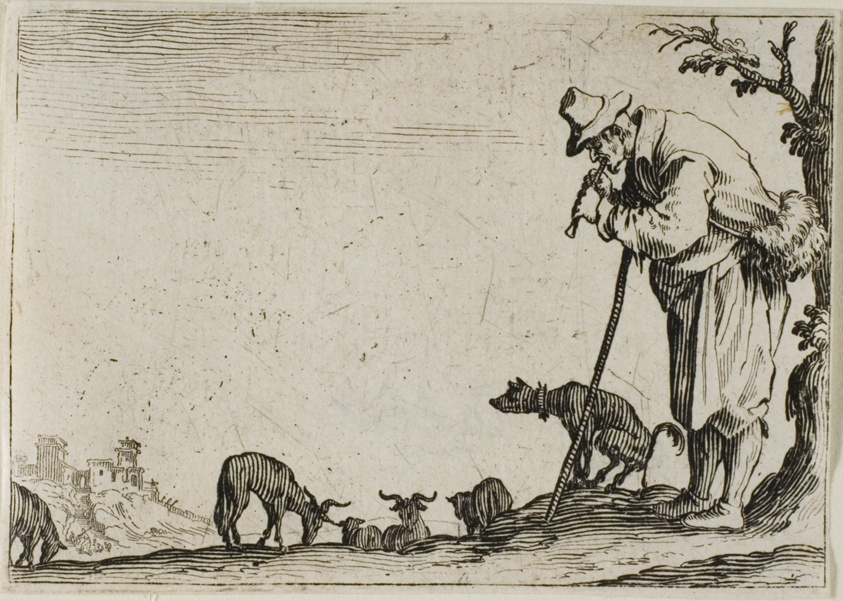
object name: Print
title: The Shepherd Playing a Flute, from The Caprices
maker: Jacques Callot (French, 1592-1635)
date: c. 1622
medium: Etching in black on ivory laid paper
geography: France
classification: etching; print; prints and drawing